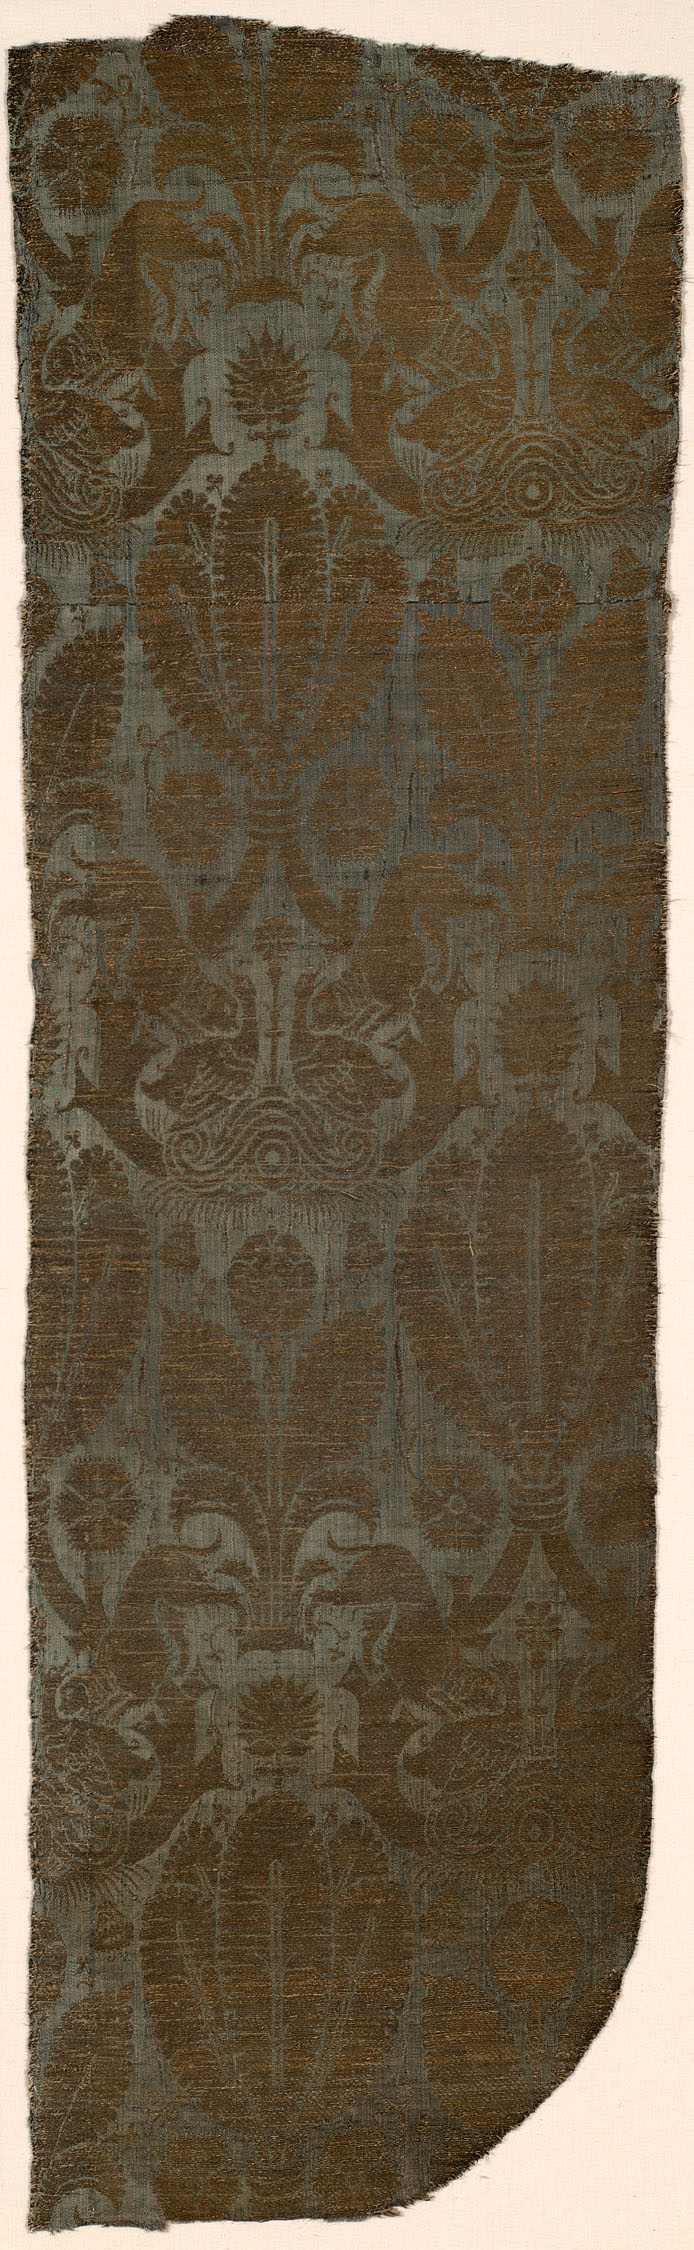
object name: Textile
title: Fragment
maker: Italy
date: 1350/1400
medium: Silk and gilt-animal-substrate-wrapped linen, warp-float faced 3:1 twill weave with supplementary patterning wefts bound by secondary binding warps in a weft-float faced 3:1 twill weave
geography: Lucca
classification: textile; weaving